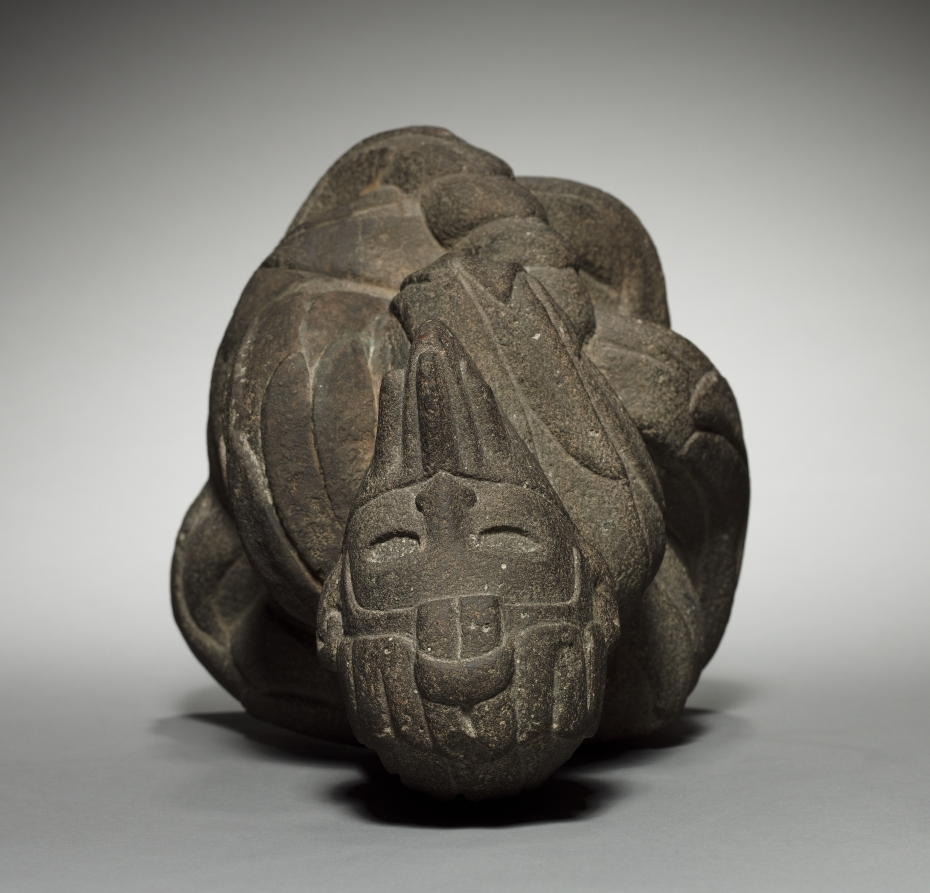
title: Feathered Serpent (Quetzalcoatl)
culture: Central Mexico, Aztec or modern, Post-Classic Period or modern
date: 1325–1521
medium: stone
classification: Stone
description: The museum bought this sculpture in 1941, when study of ancient American arts was in its infancy. It has many odd features, a few perhaps revealing an attempt to make the subject—the Aztec deity Quetzalcoatl (Feathered Serpent)—palatable to modern viewers. But it cannot absolutely be declared fake because some real Aztec sculptures are unusual. Analysis of the surface so far provides no help. Especially odd is the arrangement of the coils into bulges that suggest the pectorals, knees, and buttocks of a human body, as though the sculpture represents a human in a serpent costume. Real Aztec sculpture usually portrays the serpent's dangerous body more realistically. Also, the mouth mask—the insignia of a wind deity related to Quetzalcoatl and, thus, perhaps appropriate—is much larger in genuine sculptures. This suggests that, because the mask and its authentic proportion are strange to our eyes, a forger scaled it down. Other uncommon features include the incomplete carving of the ears, the fact that the human head does not emerge from a serpent's mouth, and more.